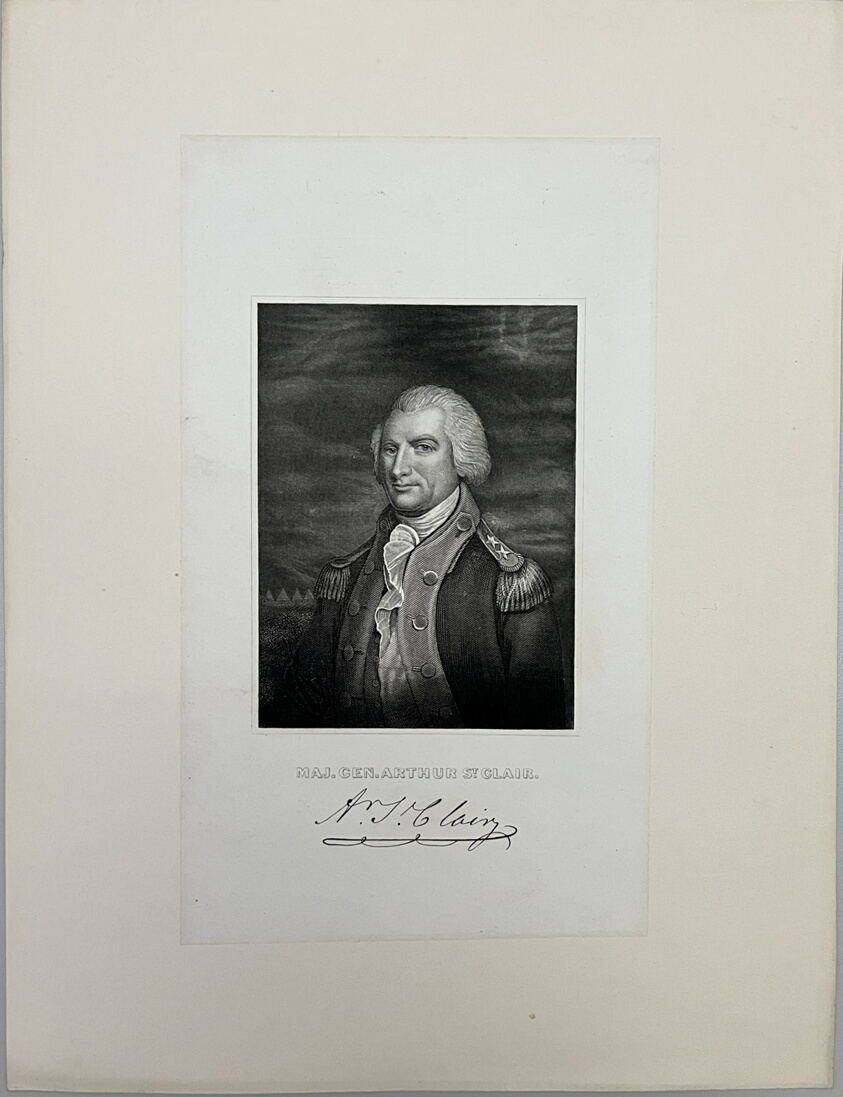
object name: Print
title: Major General Arthur St. Clair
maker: Artist Unknown (Likely American, 19th century); after Edward Wellmore (American, active mid-19th century); after James Barton Longacre (American, 1794-1869); after Charles Wilson Peale (American, 1741-1827)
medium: Etching on paper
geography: United States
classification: reproduction; print; prints and drawing